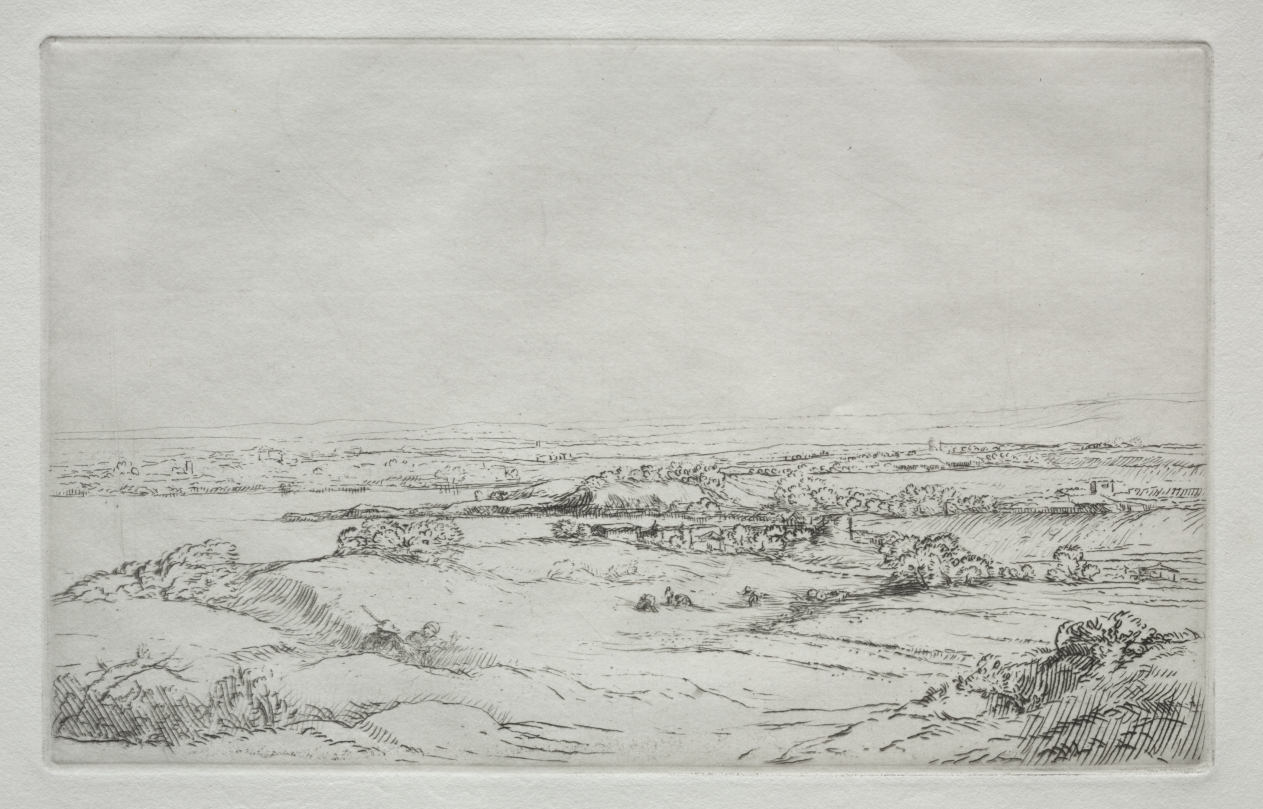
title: The Meadow near the Lake (La Plaine Près Du Lac)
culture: France, 19th-20th century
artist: Alphonse Legros (French, 1837–1911)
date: c. 1857–1911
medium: etching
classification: Print